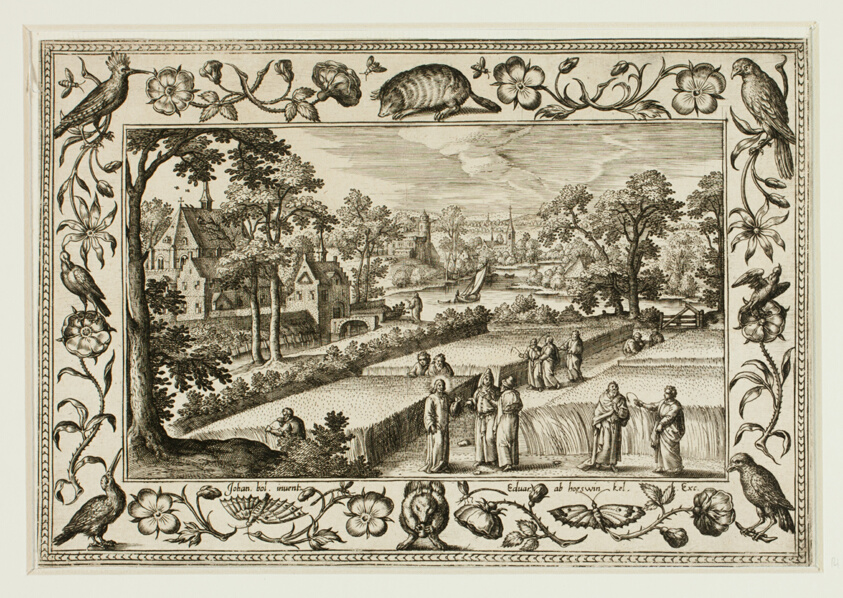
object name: Print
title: Christ and the Disciples in the Field, from Landscapes with Old and New Testament Scenes and Hunting Scenes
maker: Adriaen Collaert (Flemish, c. 1560–1618); after Hans Bol (Flemish, 1535–1593); published by Anna van Hoeswinckel (Flemish)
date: 1584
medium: Engraving in black on cream laid paper, laid down on cream laid paper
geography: Flanders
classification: engraving; paper; print; prints and drawing